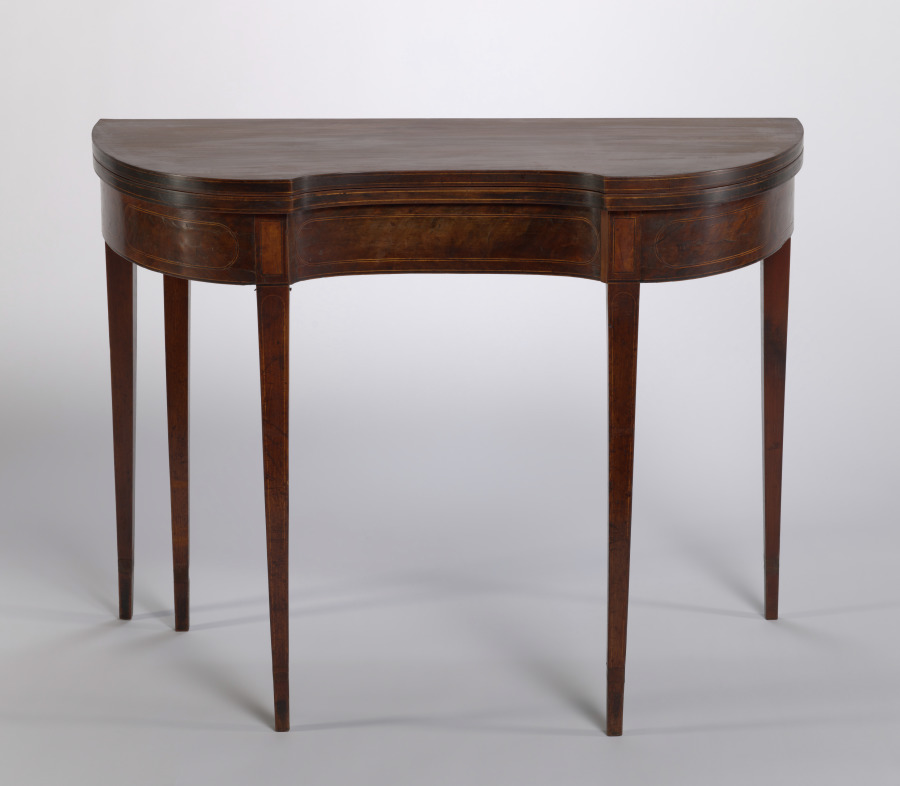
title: Game Table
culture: America, Maryland, Baltimore, early 19th Century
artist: style of George Hepplewhite (American, 1786)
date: c. 1800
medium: mahogany with inlays of various woods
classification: Furniture and woodwork